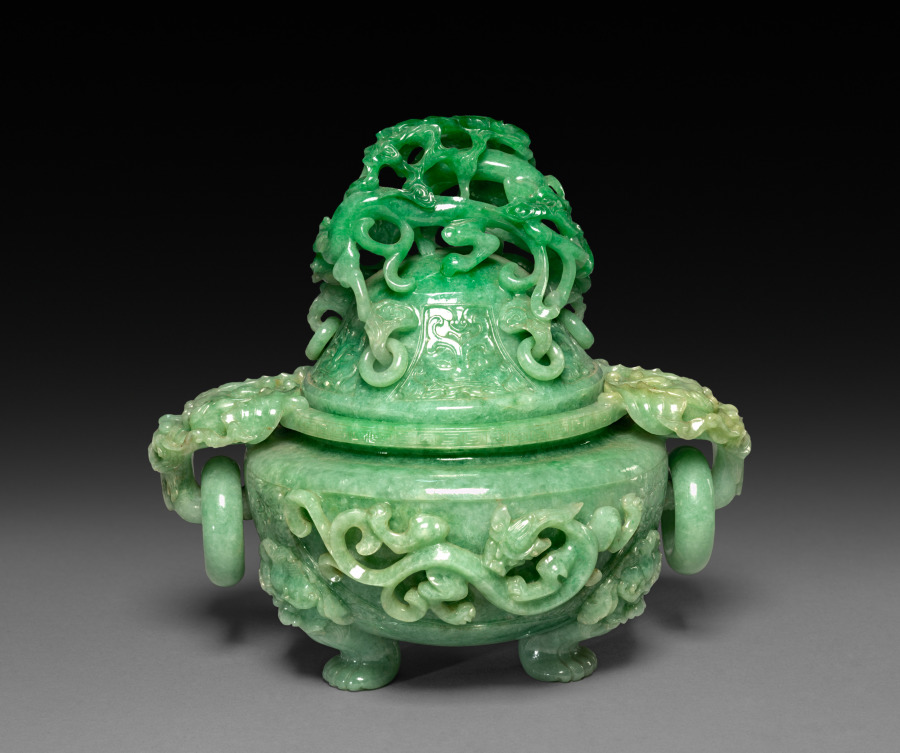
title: Three-Sectional Altar Group: Koro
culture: China, Qing dynasty (1644-1911)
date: 1644–1911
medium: jade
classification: Jade